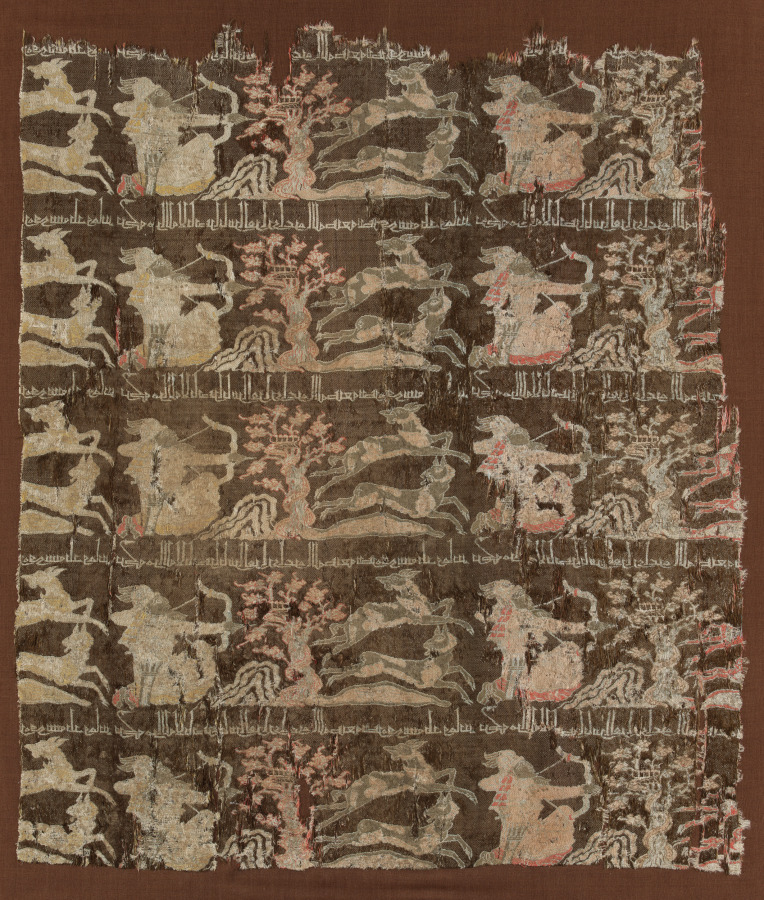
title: Fragment with Inscription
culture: Iraq, Basrah, in the style of the Abbasid period (750–1258)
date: dated 818 (AH 203), but before 1978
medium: Silk: compound weave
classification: Textile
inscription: Barakah min Allah li-Aba [sic for Abi] Nasr Iyas al-Fazari a'azzahu Allah. Sana'ahu bi-Basrah fi sanati thalath wa-ma'it[ay]n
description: An archer kneels to left of a tree and the hill to shoot at pair of deer. The polychrome design is repeated across horizontal rows on dark brown ground.